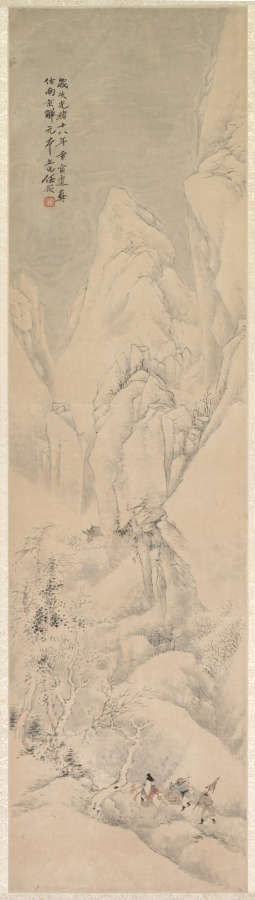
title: Landscape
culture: China, Qing dynasty (1644-1911)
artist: Ren Yu (Chinese, 1853–1901)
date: 1892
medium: Hanging scroll; color on paper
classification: Painting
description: This seasonal landscape is from a set of four hanging scrolls by Ren Yu. He was the youngest, most eccentric, and least prolific of the Four Rens, a family of prominent painters in Shanghai during the late Qing dynasty (1644–1911). Perhaps due to his opium habit and subsequent financial difficulties, Ren Yu tended to be lackadaisical in his work. The few remaining high-quality paintings hint at his artistic potential lost to opium. Though Ren’s premature death left his artistic promise unfulfilled, his paintings were acquired and donated to the museum by Charles Lang Freer (1854–1919), a wealthy businessman and art collector from Detroit. As Freer had hoped, this donation of Ren Yu paintings inspired the young Cleveland Museum of Art to continue to expand its own Chinese painting collection.